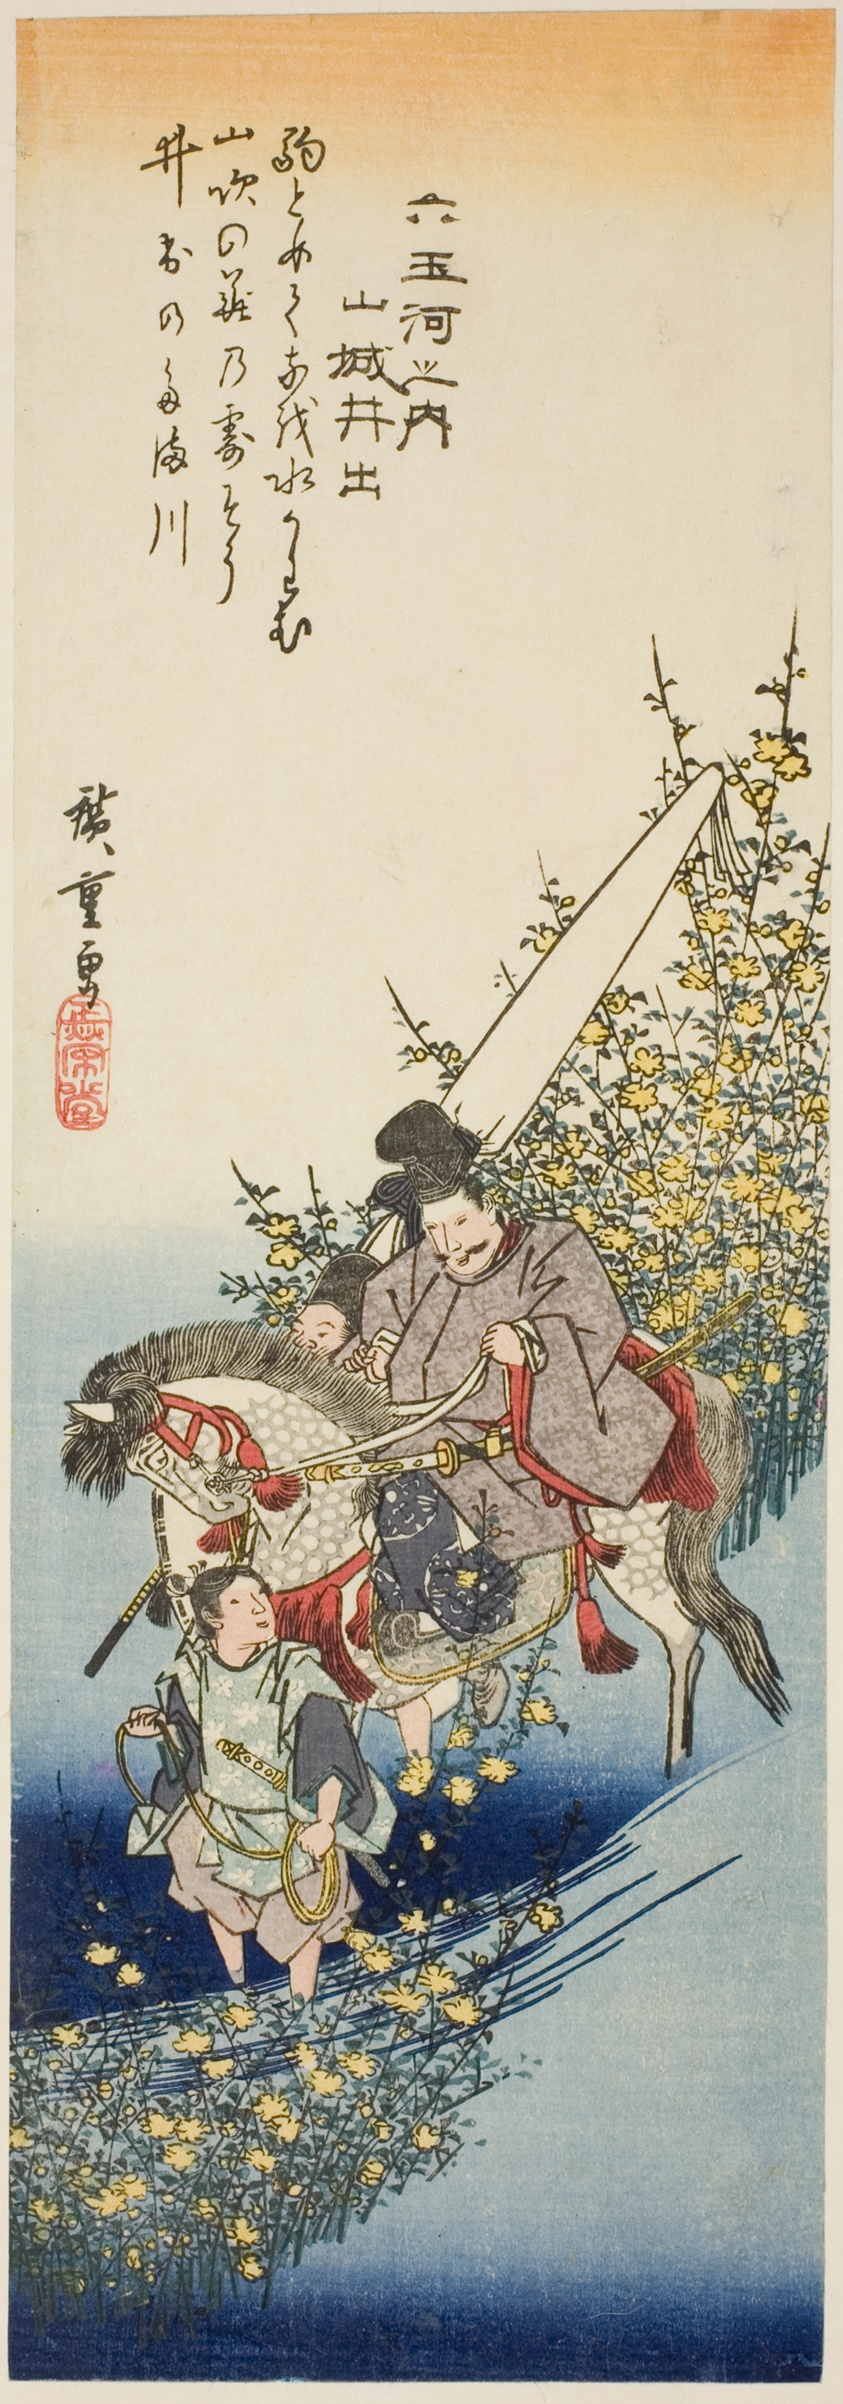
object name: Print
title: Ide Jewel River in Yamashiro Province (Yamashiro Ide), from the series "Six Jewel Rivers (Mu Tamagawa no uchi)"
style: Japanese (culture or style)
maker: Utagawa Hiroshige 歌川 広重; Japanese, 1797-1858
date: c. 1835/39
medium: Color woodblock print; chutanzaku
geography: Japan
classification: print; asian art